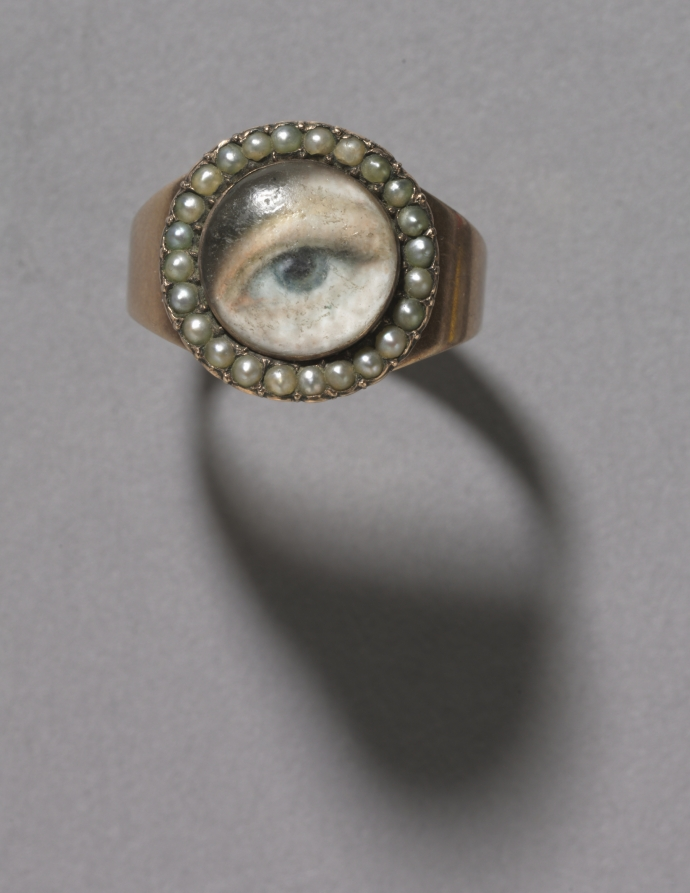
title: Eye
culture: America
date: 1900s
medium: watercolor on ivory set in a ring with split pearl border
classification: Portrait Miniature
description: Eye miniatures were popular in Europe between 1790 and 1830. Only in a few extraordinary cases do we know whose eyes were painted and their limited scope makes it almost impossible to identify the artist, though we know that many famous miniaturists painted eye portraits including John Smart, Richard Cosway, and George Engleheart. Because the artist and the sitter could be known only to the person who commissioned or received the object, these eyes are distinguished from miniatures and portraits for their private significance and insurmountable mystery. There are six eye miniatures in the Cleveland Museum of Art's collection, but this is the only ring. It was probably worn by a woman, but we do not know if the eye belonged to a male or female. Eye miniatures are often set in highly elaborate jeweled frames that balance their simplicity and emphasize their preciousness. The pearls, with a spherical luster that recalls tears, suggest that this was a mourning ring—expressing grief for a lost loved one. Pearls were not cultured until the 1900s, and were highly valued during the 1800s when this was probably painted, making the ring both sentimental and valuable to its owner. In 2000 three of the CMA's eye miniatures appeared in an exhibition on Alfred Hitchcock and art, highlighting their eerie fascination for modern viewers and their relationship to Surrealism and issues of surveillance.